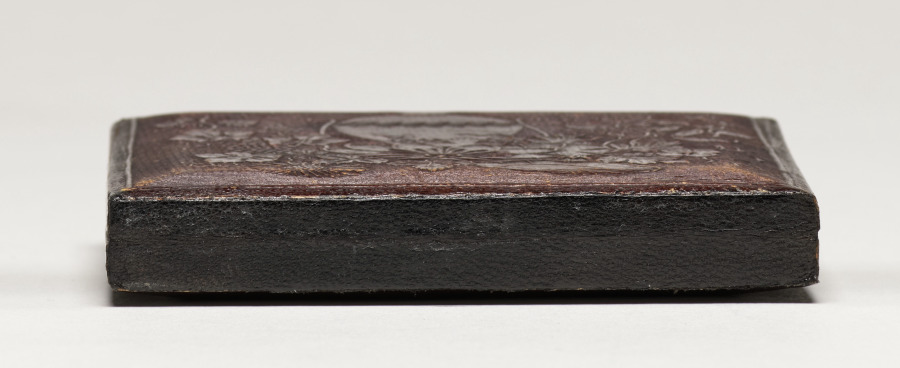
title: Girl with Doll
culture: America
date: 1850s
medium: daguerreotype, sixth plate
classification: Photograph